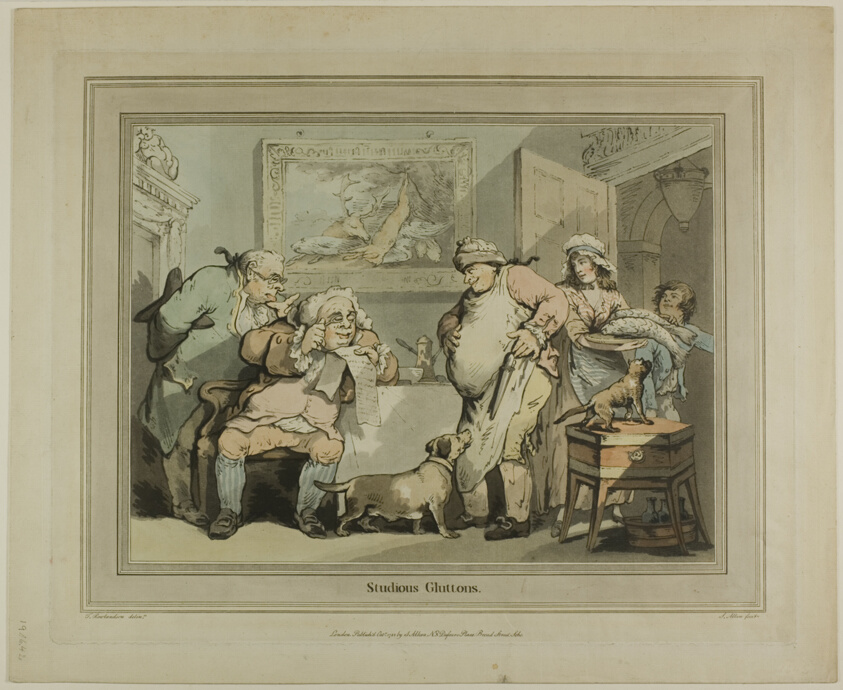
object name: Print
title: Studious Gluttons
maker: Thomas Rowlandson (English, 1756-1827)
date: published October 1788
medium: Hand-colored etching and aquatint on ivory wove paper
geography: England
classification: etching; print; prints and drawing